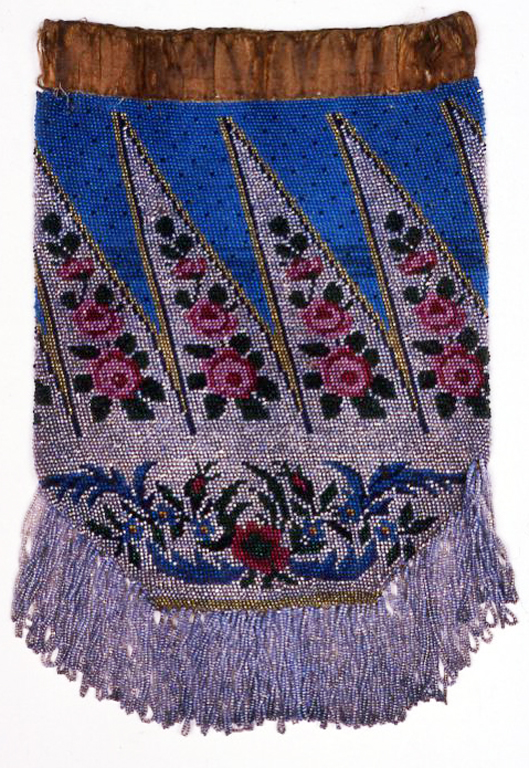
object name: Costume and Accessories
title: Bag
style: americas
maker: United States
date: c. 1839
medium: Silk, crossed knitting with glass beads; silk and glass beads, loop fringe; band: silk, plain weave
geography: North America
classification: textile; bag - needlework; fringe; reticule; costume accessory - bag; costume accessory; costume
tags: flowers, white (color), blue (color), pink (color), yellow (color), black (color), foliage, roses